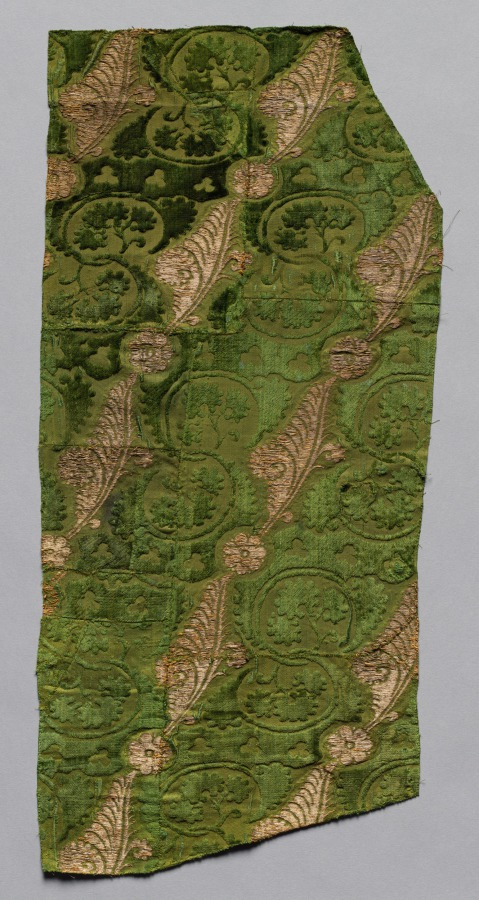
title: Brocaded Velvet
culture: Italy, late 14th century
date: late 1300s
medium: velvet weave (cut with two heights of pile, and uncut, voided, brocaded): silk and gold thread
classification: Velvet